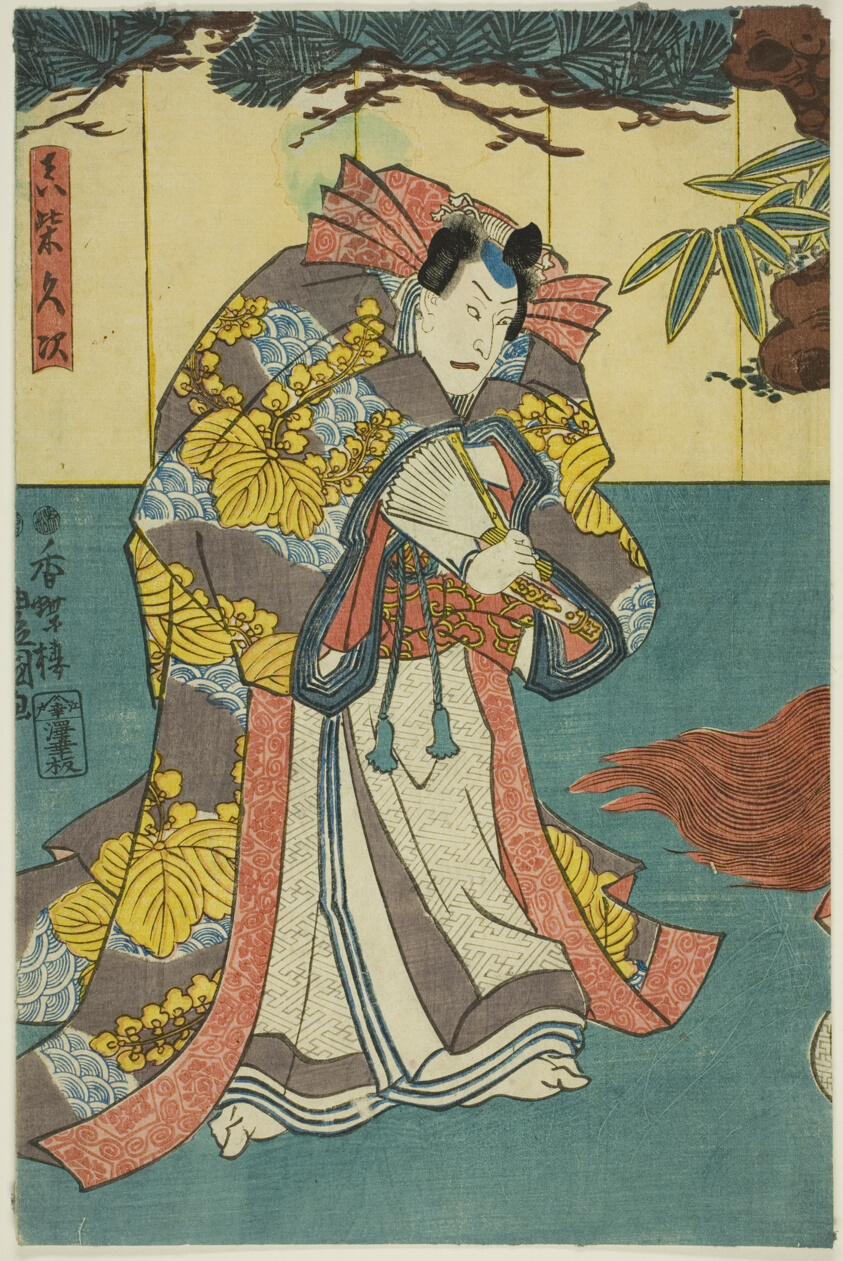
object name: Print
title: The actor Ichikawa Danjuro VIII as Mashiba Hisatsugu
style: Japanese (culture or style)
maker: Utagawa Kunisada I (Toyokuni III) (Japanese, 1786-1864)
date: 1851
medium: Color woodblock print; left sheet of oban diptych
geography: Japan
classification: woodblock print; print; asian art